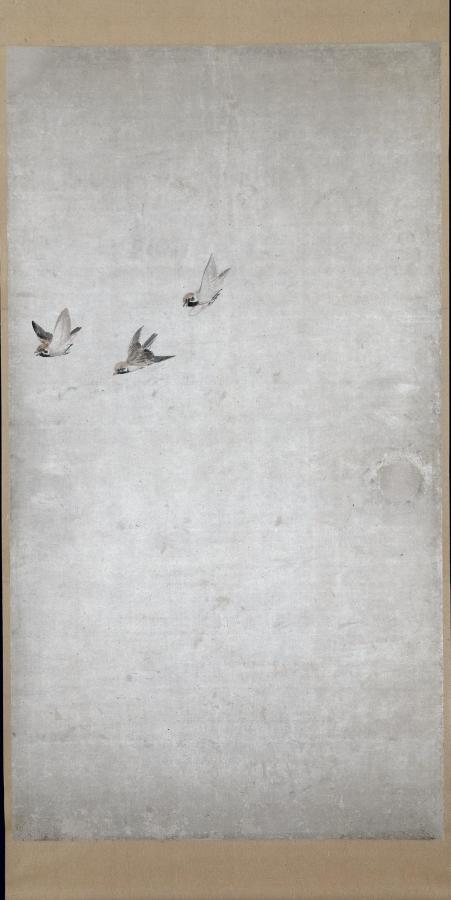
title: Puppies, Sparrows, and Chrysanthemums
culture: Japan, Edo period (1615–1868)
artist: Nagasawa Rosetsu (Japanese, 1754–1799)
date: c. 1792–94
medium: Fusuma panel remounted as a hanging scroll; ink and slight color on paper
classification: Painting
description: These paintings were originally mounted as sliding doors (fusuma) used inside a building. The circular areas on the paintings’ paper surfaces are traces of the former positions of the door pulls (hikite). A flock of sparrows gathers on a trellis supporting flowering chrysanthemum. Below is a litter of puppies, some cavorting, others napping. The tender story created by the curious puppy peering up and tilting its head to listen to the bird’s insistent call in the leftmost part of the composition is characteristic of Nagasawa Rosetsu’s paintings, which often use animals to illustrate the human condition.